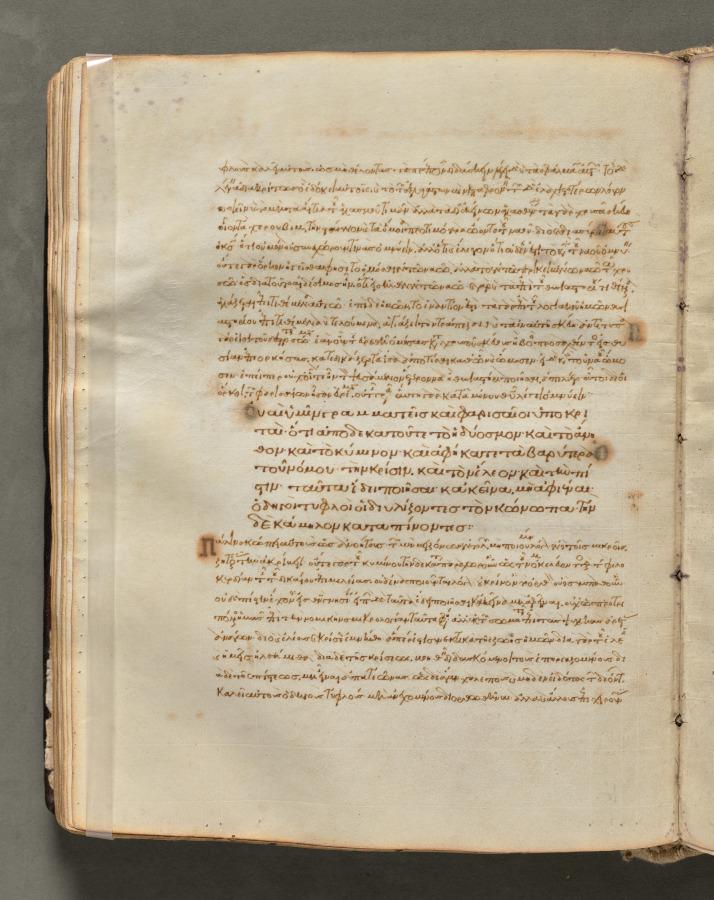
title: Text, folio 102 (verso), from a Gospel Book with Commentaries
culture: Byzantium, Constantinople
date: c. 1000–1100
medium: ink, tempera, and gold on vellum; leather binding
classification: Bound Volume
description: Each of the four gospels in this book opens on a page with brilliantly illuminated borders depicting the author of the text as well as birds-principally peacocks, symbols of the immortality of the soul-and fountains, representing the fountain of life and the salvation of the soul. This volume consists of 428 leaves with texts in Greek. Its level of sophistication suggests that it was probably written and decorated in a monastery in Constantinople.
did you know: Gospel Books were carried in procession through Byzantine churches.